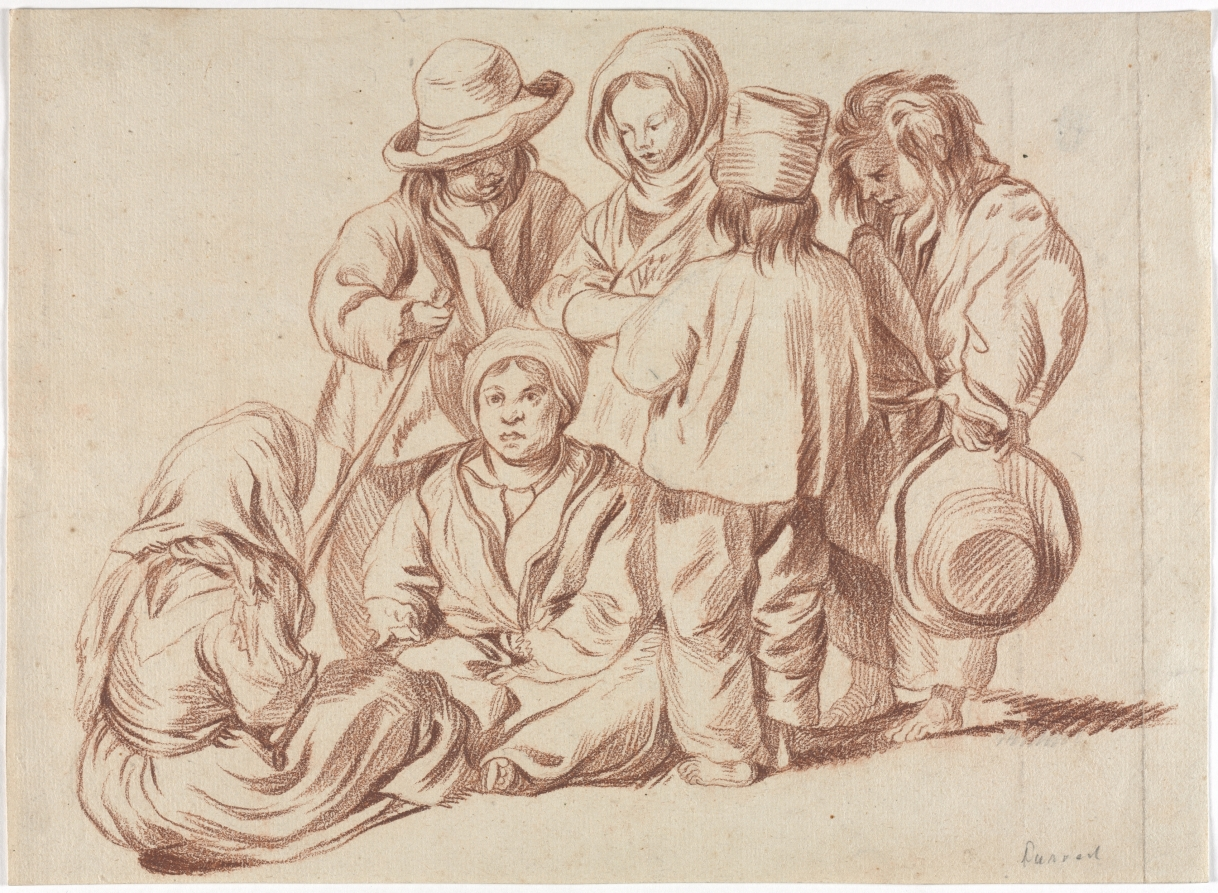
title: Group of Six Children (recto)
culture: France, 18th century (?)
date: 1700s(?)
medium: red crayon over traces of black chalk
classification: Drawing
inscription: lower right, in graphite: Du[illegible]